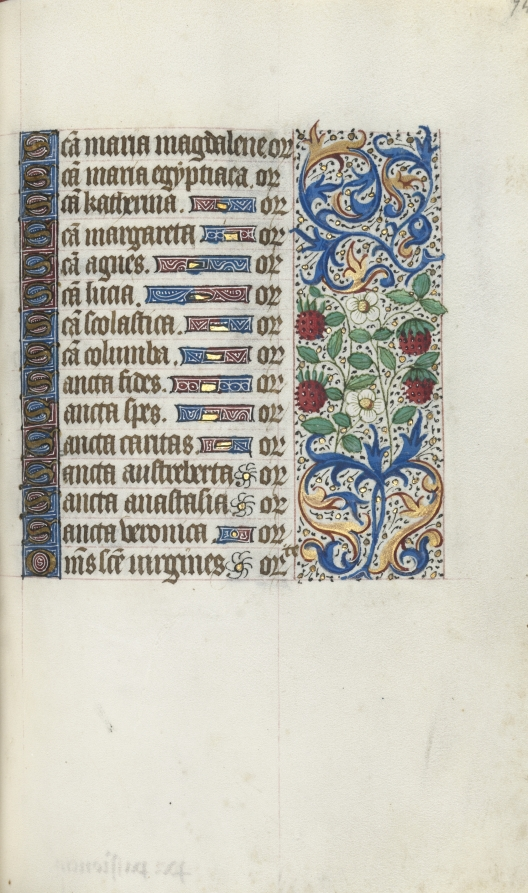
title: Book of Hours (Use of Rouen): fol. 94r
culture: France, Rouen, 15th century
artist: Master of the Geneva Latini (French, active Rouen, 1460–80)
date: c. 1470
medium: ink, tempera, and gold on vellum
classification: Bound Volume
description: In the late 1400s and early 1500s Rouen was an established and important center of book production. The city’s cathedral had a wealthy chapter that spent large sums of money to commission books and to maintain its extensive library. The stationers and booksellers would have likely been concentrated in or near the cathedral precinct. This artist, named after a manuscript now in Geneva, was Rouen’s principal illuminator during the second half of the 1400s.